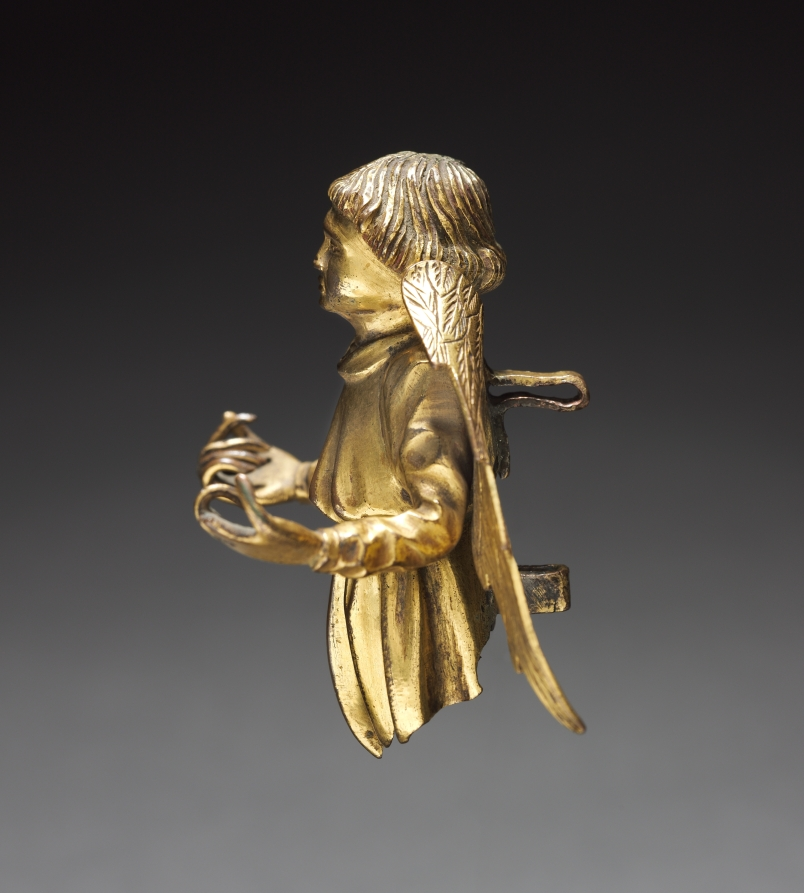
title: Angel from an Architectural Reliquary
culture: Franco-Netherlands or Paris, 15th century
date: c. 1400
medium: gilt bronze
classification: Sculpture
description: This beautiful Gothic angel is probably a surviving element from a large architectural reliquary. The last clue to its lost context disappeared when the symbolic attribute was twisted from the angel’s fingers, possibly during the destructive zeal of the French Revolution. The technique and style are characteristic of the lay workshops employed by the Valois courts during the early 1400s.